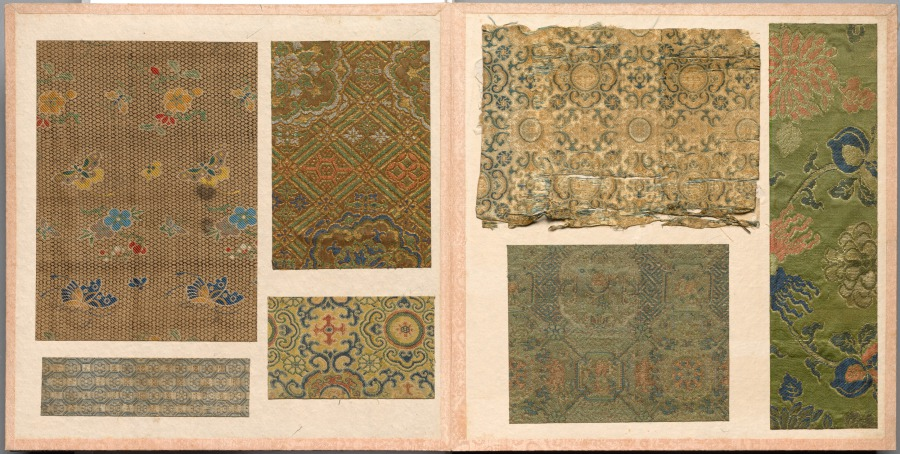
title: Album of Textile Samples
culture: Japan and China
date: 1700s–1800s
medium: silk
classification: Textile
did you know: This album contains 46 pages with 156 mounted Chinese or Japanese textile samples.